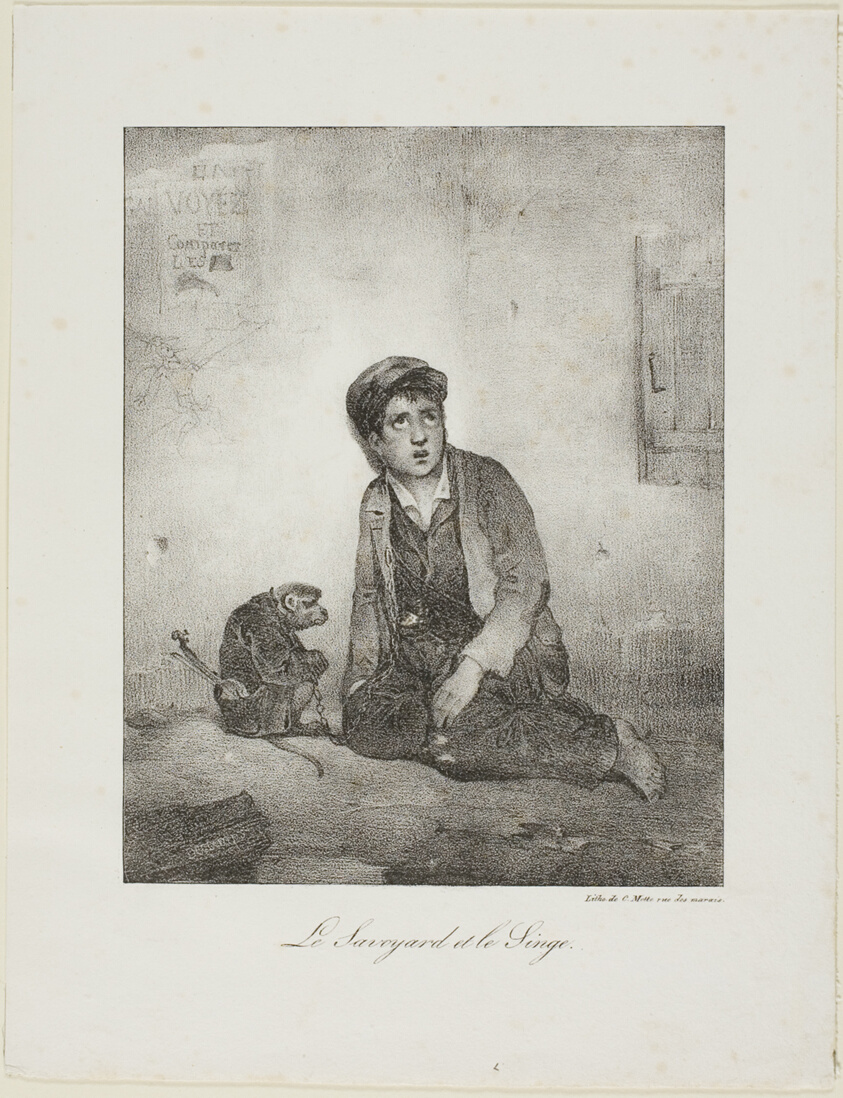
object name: Print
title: The Savoyard and the Monkey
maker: Alexandre Gabriel Decamps (French, 1803-1860); printed by Charles Motte Étienne Pierre (French, 1785-1836)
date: c. 1825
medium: Lithograph in black on white wove paper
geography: France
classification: lithograph; print; prints and drawing